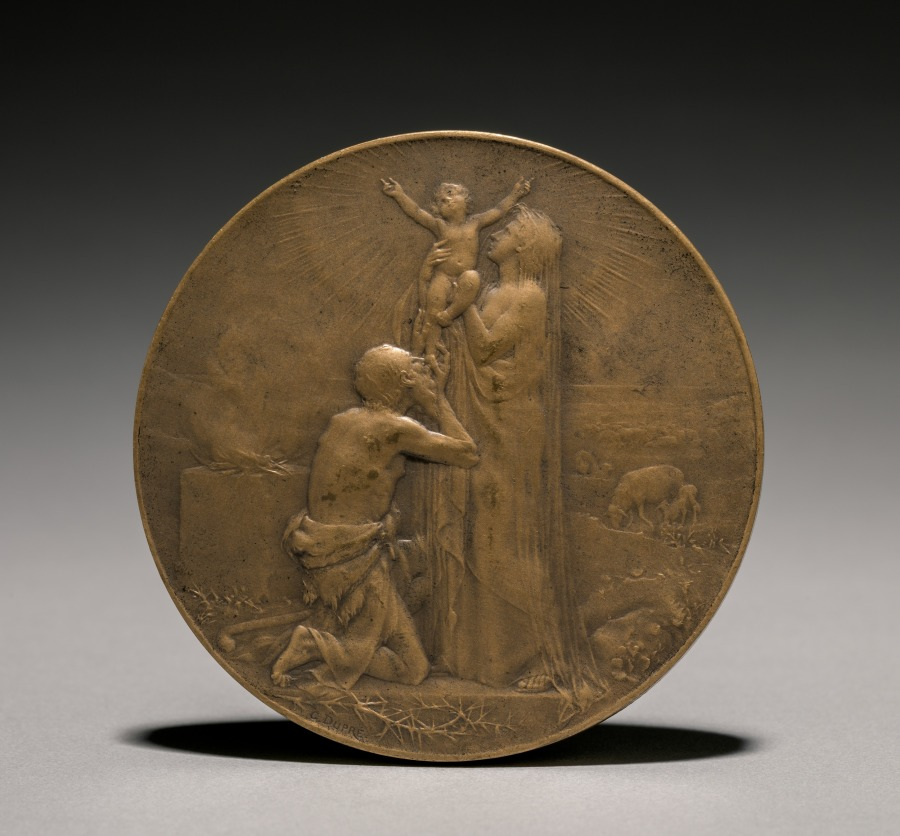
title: Medal (obverse)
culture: France, 19th century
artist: Jules Dupré (French, 1811–1889)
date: 1800s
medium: bronze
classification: Metalwork